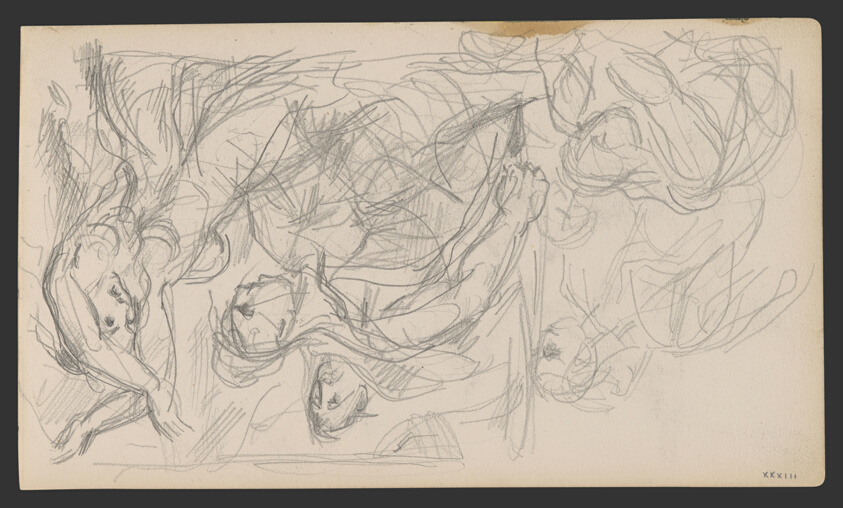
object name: Drawing and Watercolor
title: Sketchbook No. 2 (L'Estaque)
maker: Paul Cézanne; French, 1839-1906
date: 1875–86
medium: Graphite and pen and ink drawings on paper, bound into a book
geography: France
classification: sketchbook; graphite; prints and drawing; paper